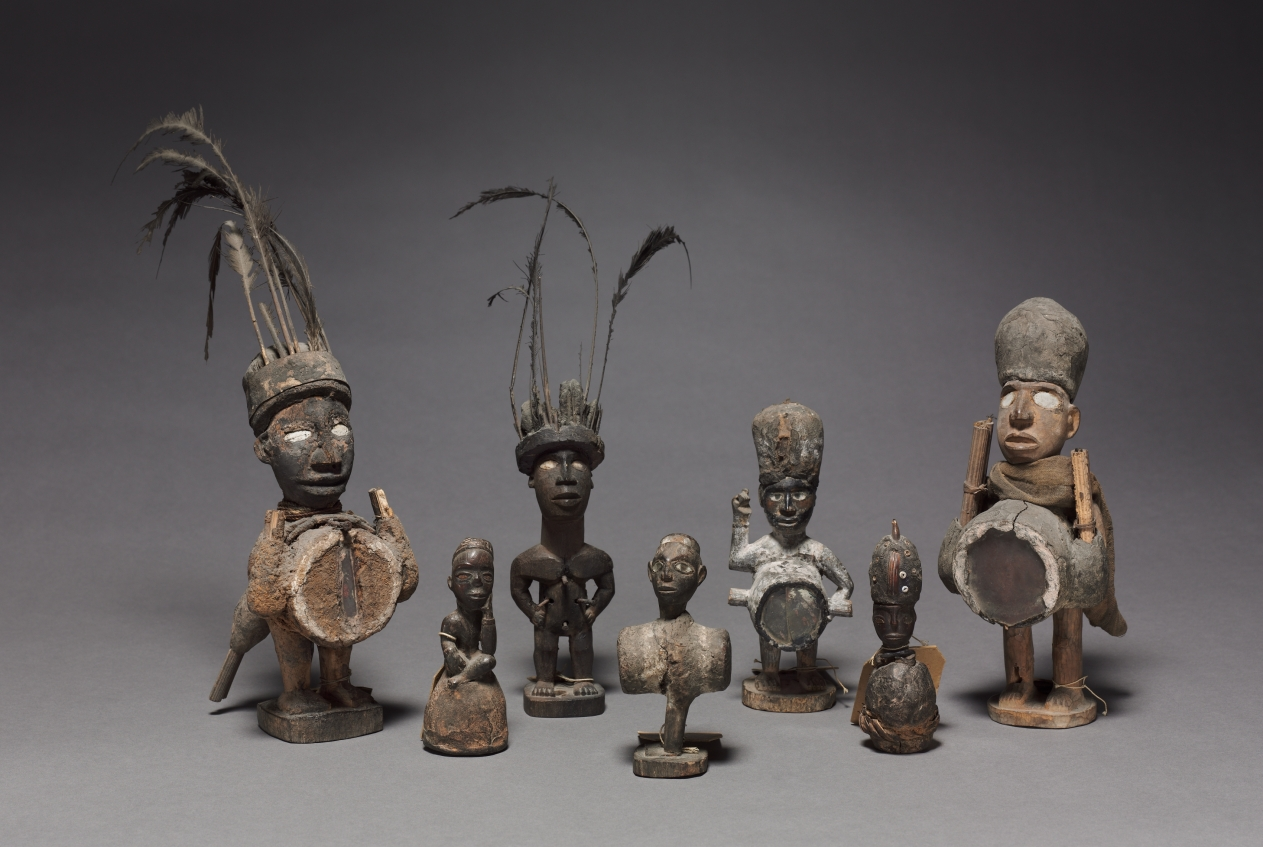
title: Power figure (nkisi)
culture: Africa, Central Africa, Republic of the Congo, Kongo-style maker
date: late 1800s–early 1900s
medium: Wood, feathers, organic material (including resin), iron, and possibly porcelain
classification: Sculpture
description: This figure had lost its nkisi load on the belly, but now shows how the mixture of earth, resin, leaves, glass, and other items was fixed onto the wooden figure, supported by four nails. It had been the property of “the sorcerer of Mboukou.”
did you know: This niksi figurine shows how the mixture of earth, resin, leaves, glass, and other items was fixed. It had been the property of “the sorcerer of Mboukou.”